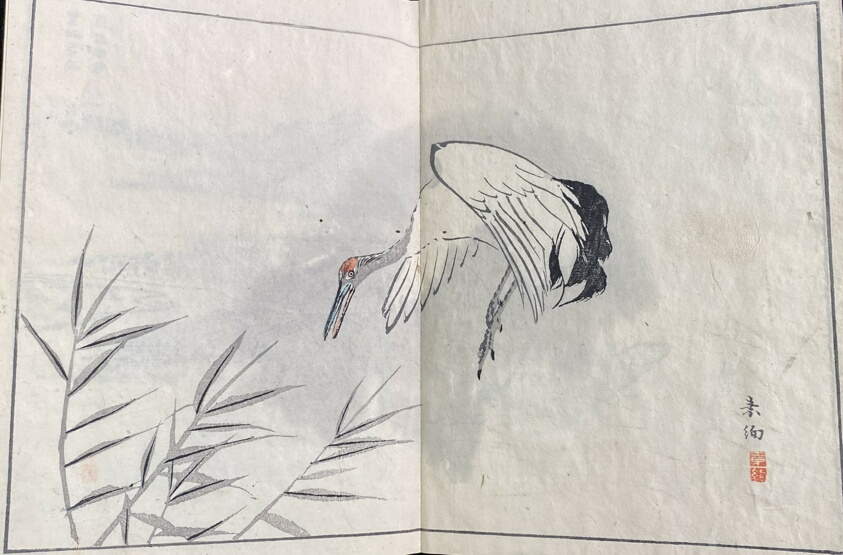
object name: Book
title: Keisei gaen/Keijo Gaen (A Garden of Pictures from the Capital)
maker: Artist unknown (Japanese)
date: 1814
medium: Woodblock-printed book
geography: Japan